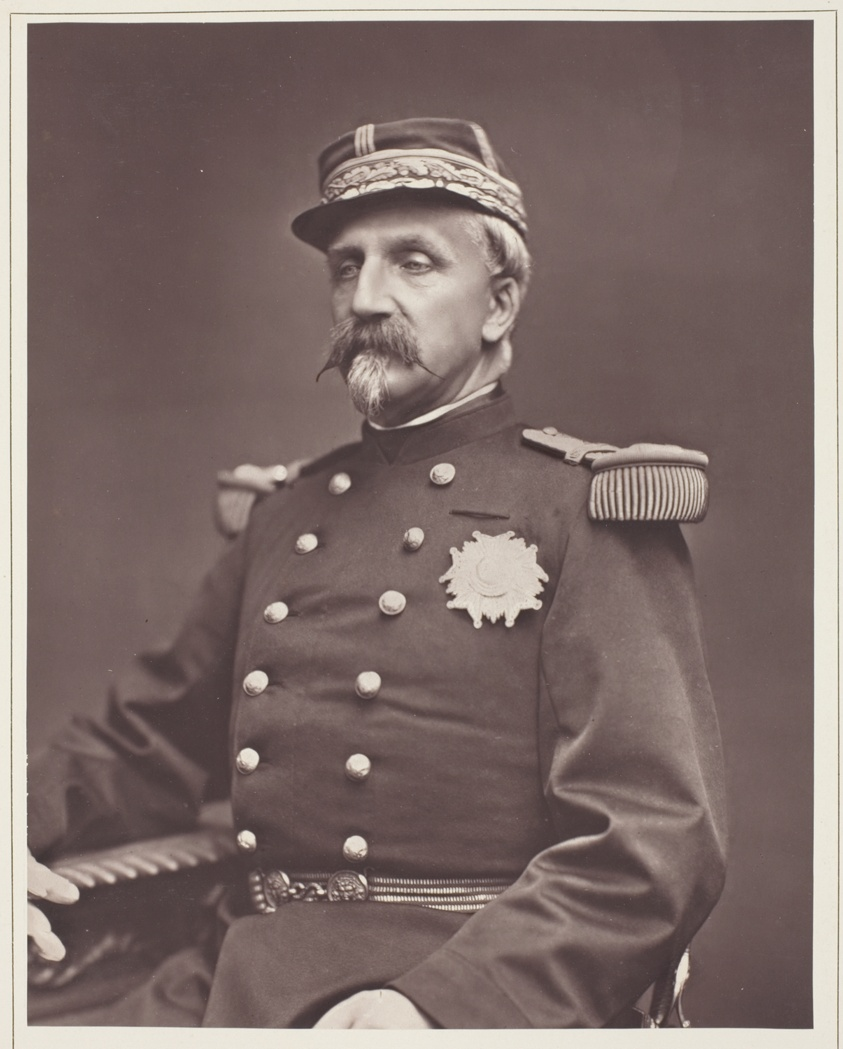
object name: Photograph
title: Duc D'amuale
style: 19th century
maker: Appert (French, 19th century)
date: 1876/78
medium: Woodburytype, from the periodical “Galerie Contemporaine Littéraire, Artistique” (1878), volume 5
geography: France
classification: gelatin silver (developing-out-paper) pr; photographic process; photography; photograph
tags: Collected by Hugh Edwards, Paris, Contemporaine Littéraire